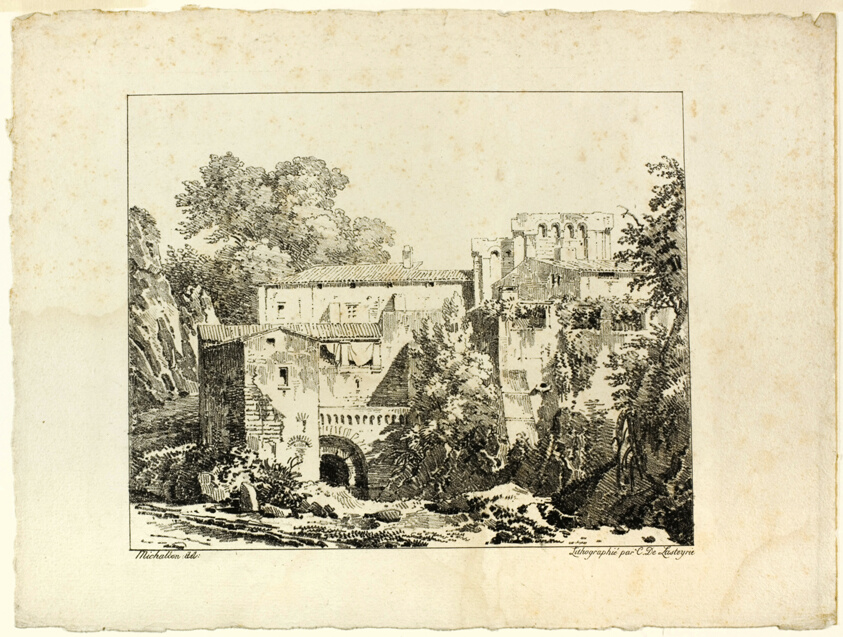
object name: Print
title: Landscape with Ruins and Viaduct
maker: Achille Etna Michallon (French, 1796-1822); printed by Comte de Charles Philibert Lasteyrie du Saillant (French, 1759-1849)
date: 1817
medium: Lithograph in black on ivory laid paper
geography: France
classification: lithograph; print; prints and drawing